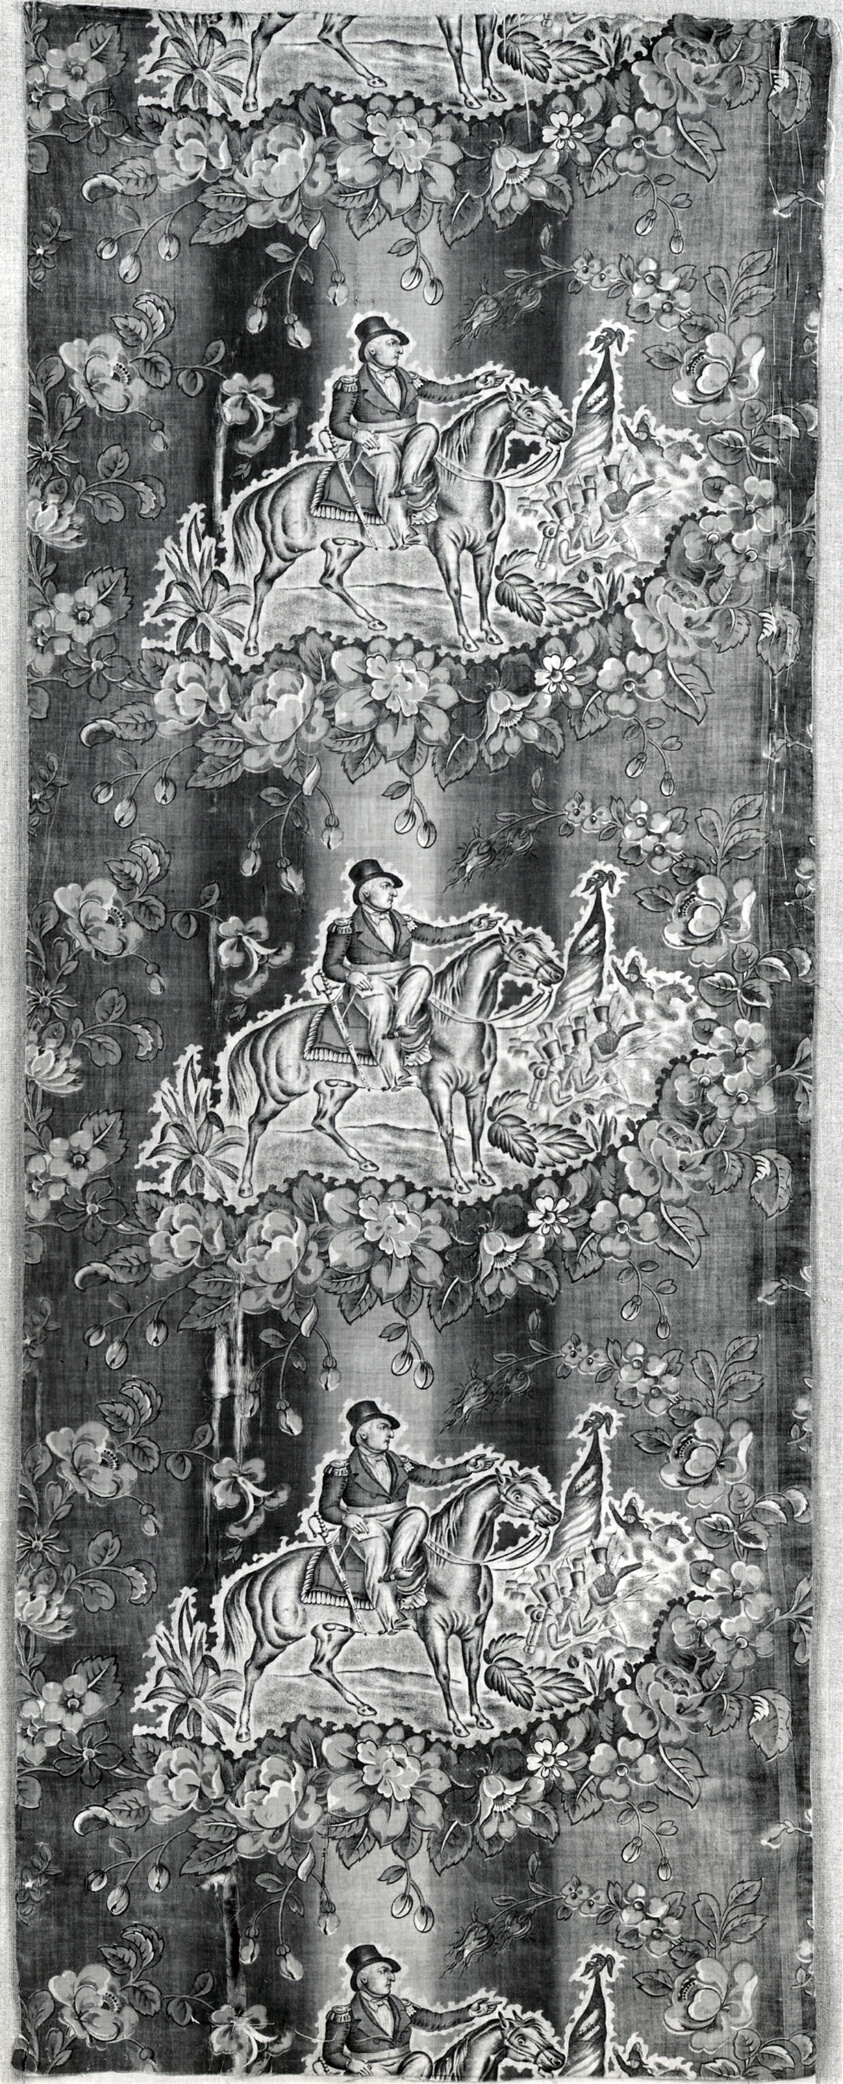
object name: Textile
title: Panel (Furnishing Fabric)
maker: United States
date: 1848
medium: Cotton, plain weave; roller printed and engraved roller printed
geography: United States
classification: textile; weaving - printed; furnishing textile